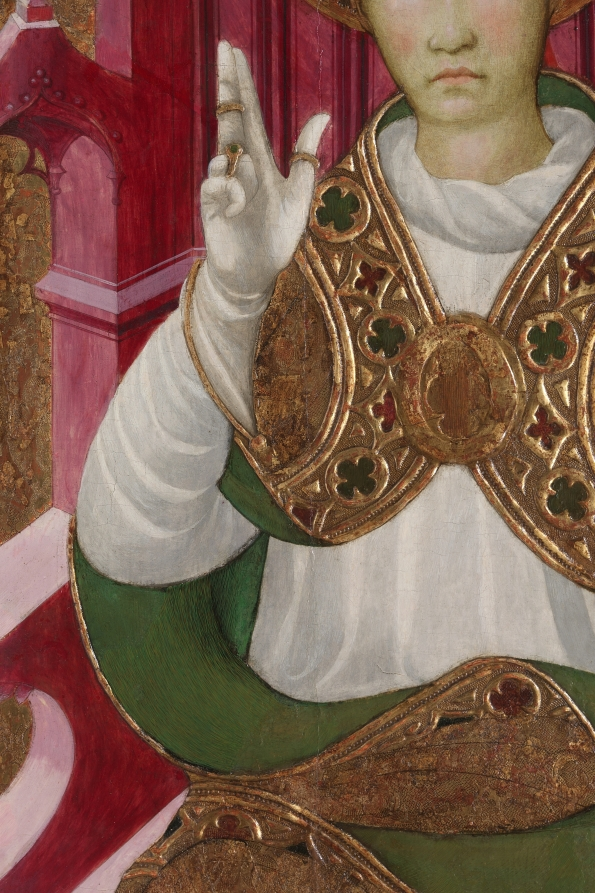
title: A Bishop Saint with a Donor (Saint Louis of Toulouse?)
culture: Spain, Catalonia, early 15th century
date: early 1400s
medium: tempera with raised and gilded gesso on wood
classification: Painting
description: The style of this painting suggests that it comes from Catalonia in northeastern Spain, though the identity of its artist remains unknown. The painting represents a youthful bishop-saint identifiable by a bishop’s symbols of authority, his miter and crozier. He wears rich vestments. Below, the figure in black represents the donor of the painting—likely a wealthy layperson rather than a cleric. The identity of the saintly bishop is speculated to be Saint Louis, Bishop of Toulouse, on the basis of his youth. Louis was consecrated Bishop of Toulouse in 1297, died six months later at the age of 23, and was canonized in 1317. His relics were moved in 1423 to Valencia and his cult flourished in Spain.